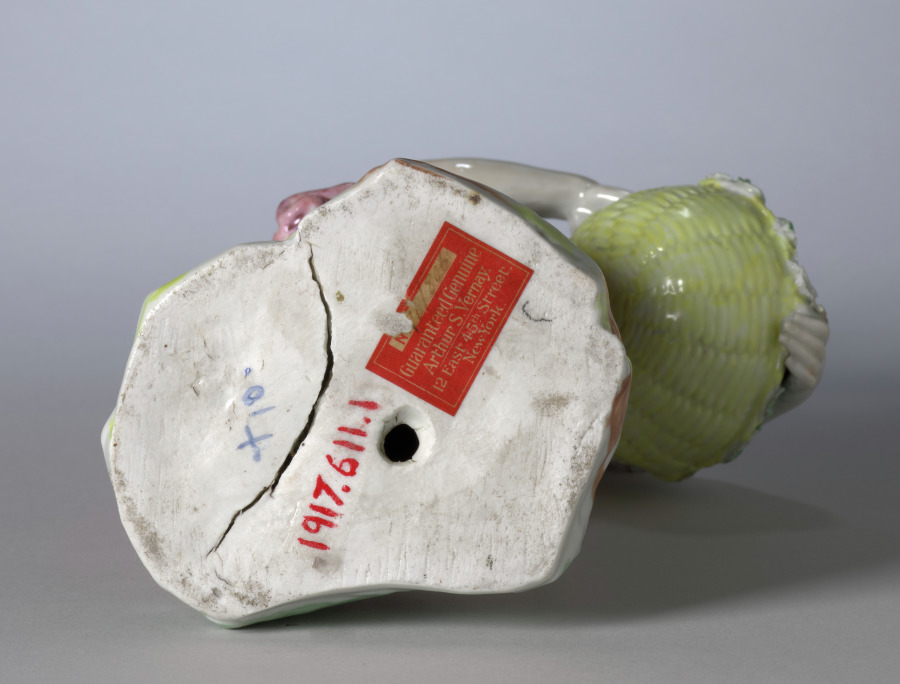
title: Figure of Autumn from the Four Seasons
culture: England, Bristol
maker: Bristol Porcelain Factory (British, 1770–81)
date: c. 1775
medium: hard-paste porcelain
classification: Ceramic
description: The modern notion of childhood as a time of innocence and simplicity emerged during the second half of the eighteenth century. This understanding of adolescence led to numerous depictions of children as personifications of the four seasons. Here autumn is portrayed as a young girl playfully jostling her overskirt as she balances a basket of fruit against her hip. The grapes, plums, and apples filling her basket allude to a plentiful fall harvest.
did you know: Allegorical figures most often decorated a table during the dessert course, providing amusing subjects for conversation.